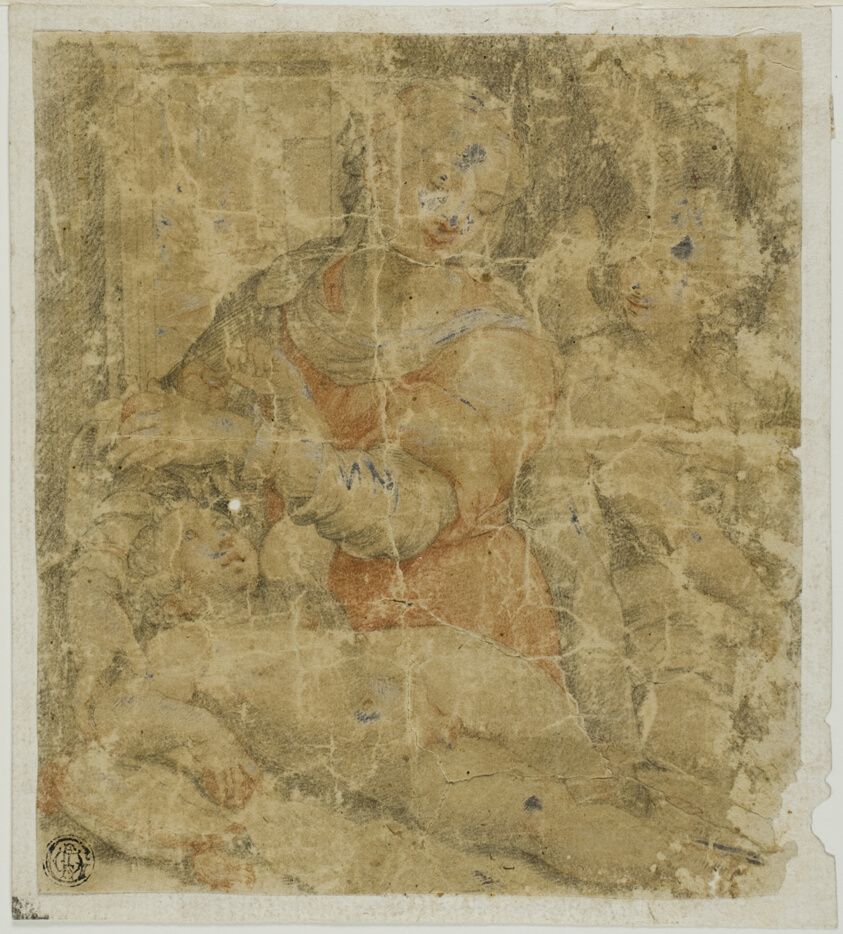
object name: Drawing and Watercolor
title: Virgin and Child with Angel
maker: After Sebastiano del Piombo; Italian, c. 1485-1547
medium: Black chalk, with red chalk, heightened with lead white (partially oxidized), on tan laid paper laid down on ivory laid card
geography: Italy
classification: chalk; drawings (visual works); prints and drawing